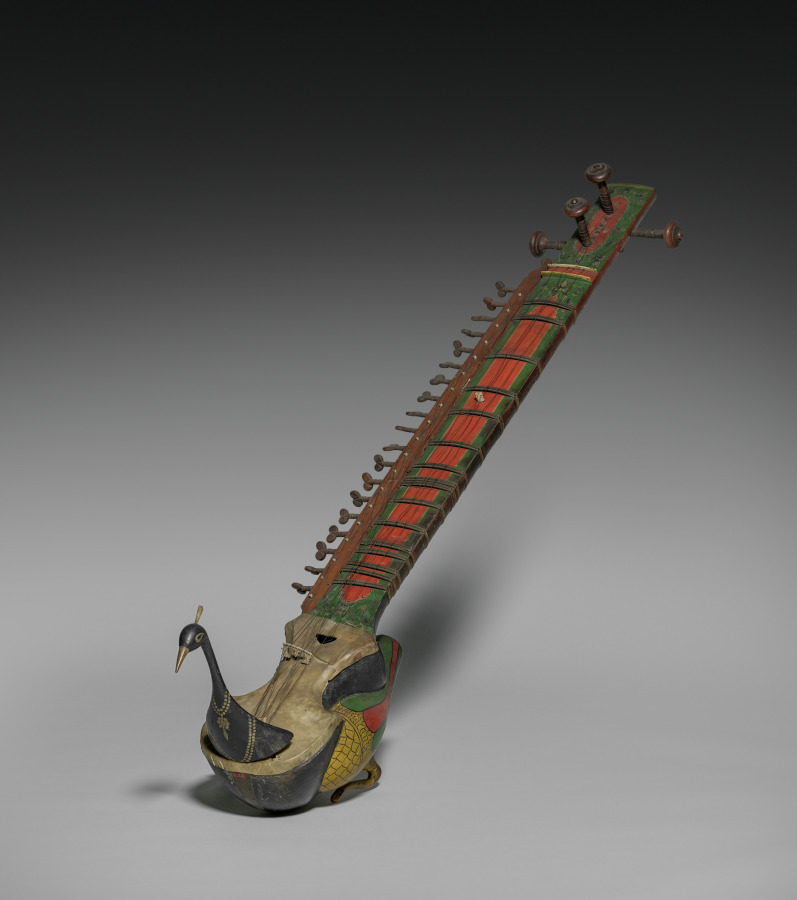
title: Taus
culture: India, Punjab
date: c. 1800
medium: Polychromed wood, parchment, bone or ivory, gut, and metal strings; frets: bronze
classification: Musical Instrument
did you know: The taus was designed by a Sikh Guru to combine the sounds of string instruments and the plaintive cry of the peacock.